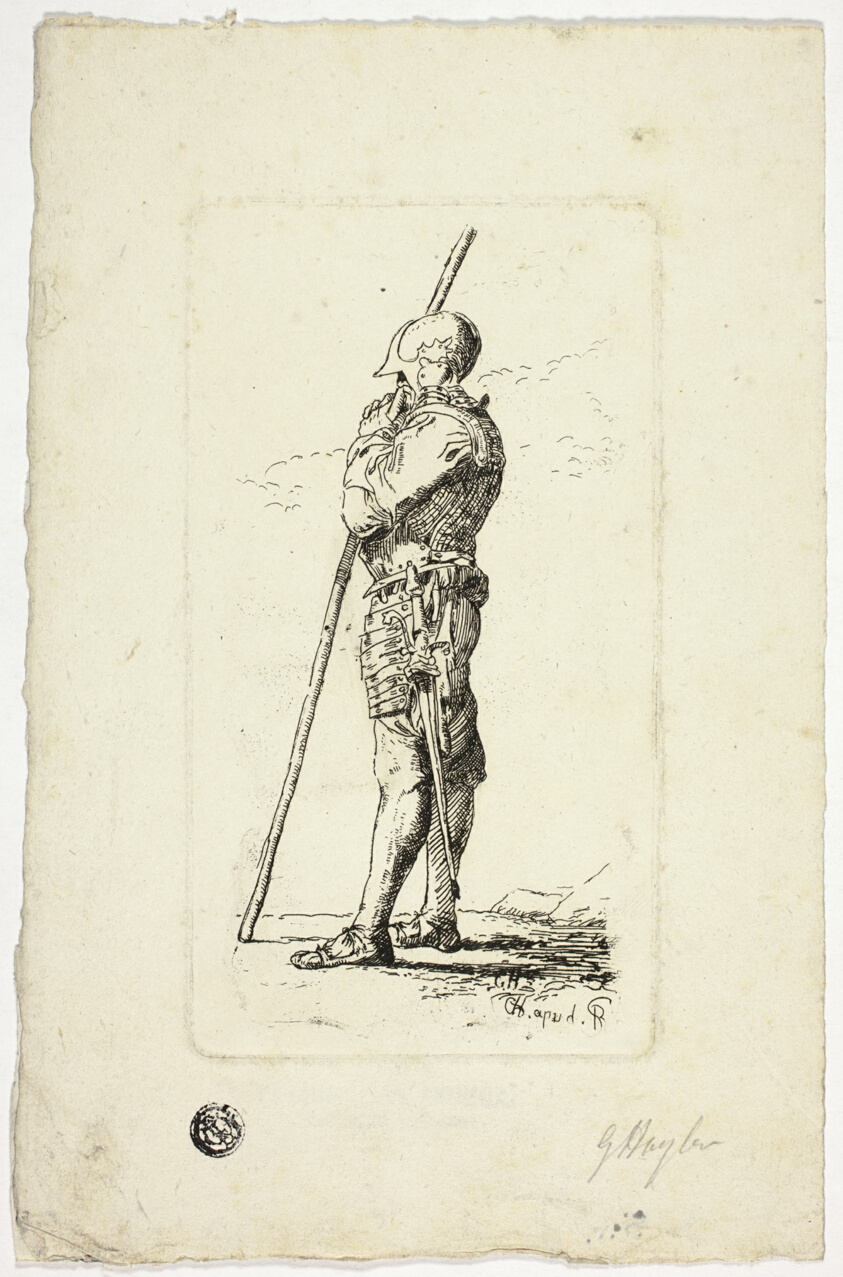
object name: Print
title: Man in Armor Holding Staff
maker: Unknown Artist; European, 1600-1800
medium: Etching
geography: Europe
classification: etching; print; prints and drawing